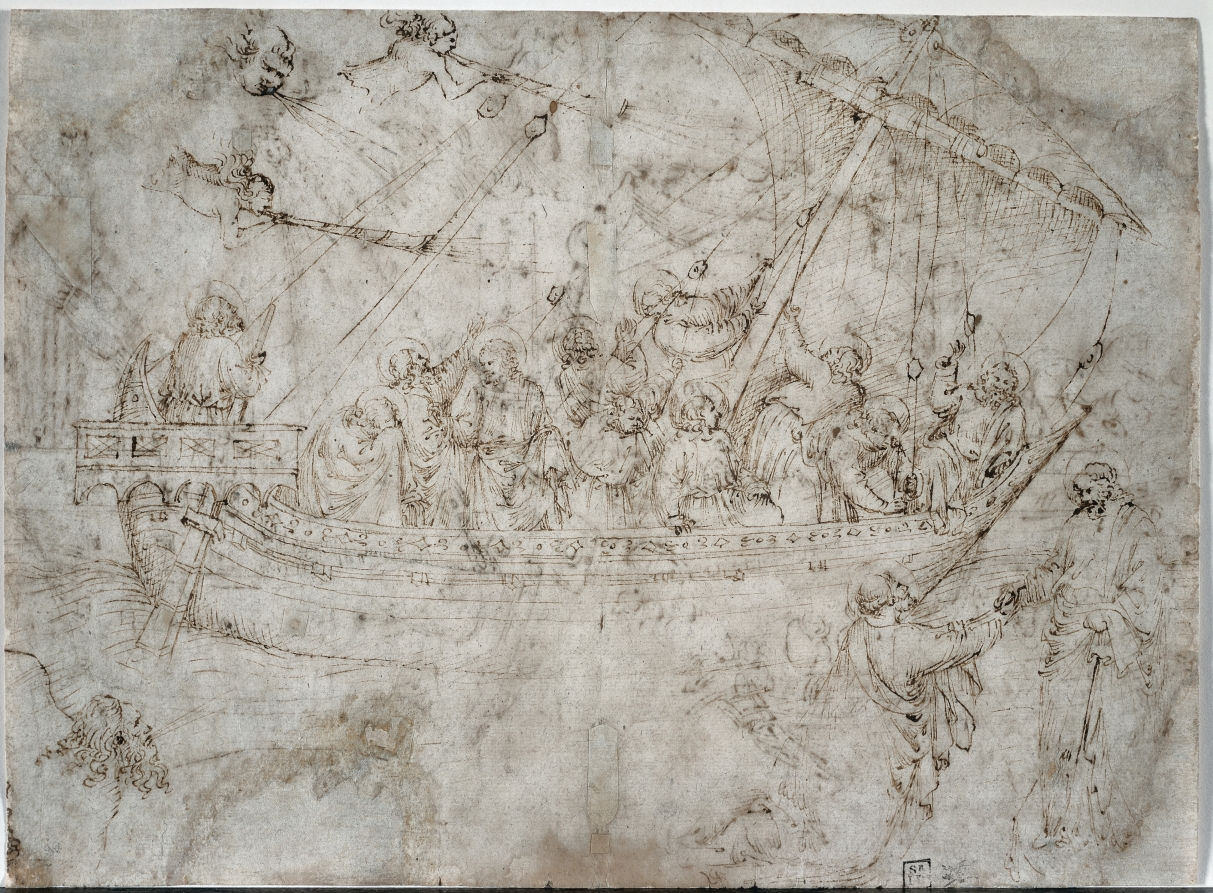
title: Two Drawings of Ships (verso)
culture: Italy, Arezzo, 15th century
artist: Parri Spinelli (Italian, 1387–c. 1453)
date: 1410s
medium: pen and brown ink (iron gall)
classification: Drawing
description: Once attributed to the Italian painter Giotto (about 1267-1337), this drawing is the oldest sheet in the Cleveland museum's collection. We now know it to be a copy by Parri Spinelli after a mosaic Giotto designed for the portico of the church of Old St. Peter's in Rome.